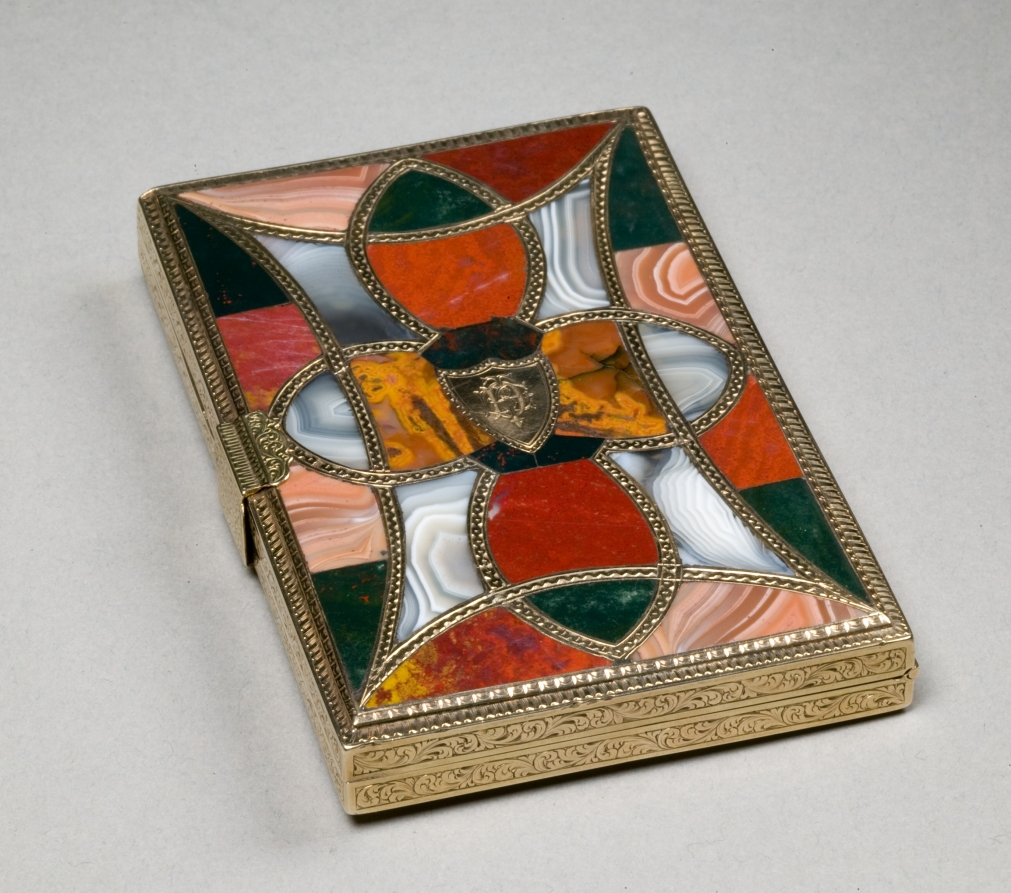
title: Cigarette Case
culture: Scotland, Edinburgh, second half 20th century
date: c. 1850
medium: gold, multi-colored agate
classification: Miscellaneous